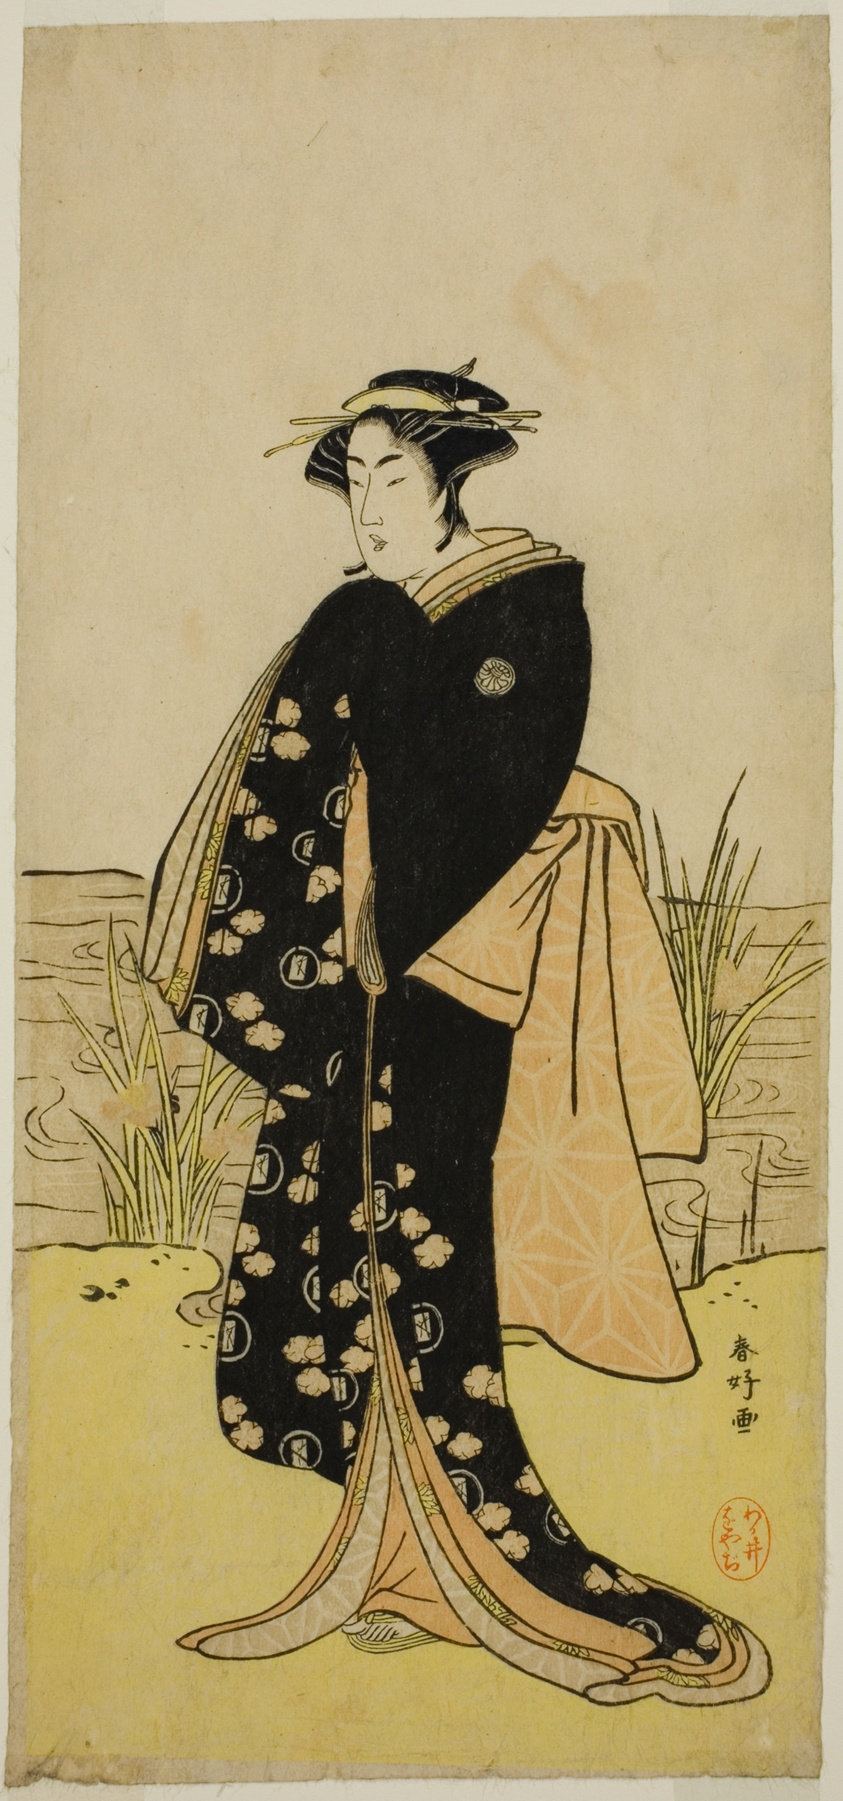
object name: Print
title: The Actor Segawa Kikunojo III as Oshichi in the Play Junshoku Edo Murasaki, Performed at the Ichimura Theater in the First Month, 1779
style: Japanese (culture or style)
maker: Katsukawa Shunko I; Japanese, 1743-1812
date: c. 1779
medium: Color woodblock print; hosoban; right sheet of diptych (?)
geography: Japan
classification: woodblock print; print; asian art